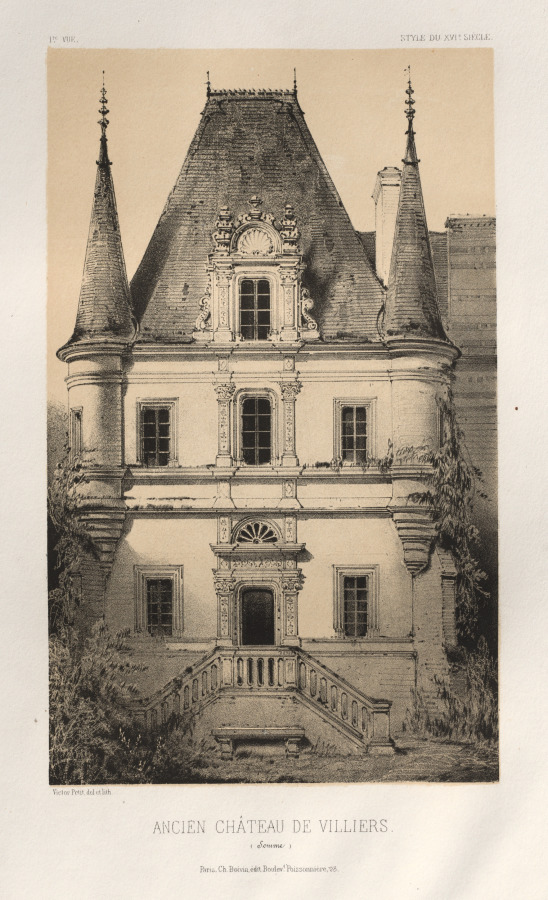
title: Architecture Pittoresque ou Monuments des xveme. Et xvieme. Siecles: Chateaux De France des XV et XVI Siecles: Pl. 1, Ancien Chateau de Villiers (Somme)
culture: France, 19th century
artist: Victor Petit (French, 1817–1874)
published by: Charles Boivin (publisher and editor); Lith de Godard a Paris (printer)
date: 1860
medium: lithograph with tint stone, from portfolio of 100 lithographs with tint stone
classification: Print